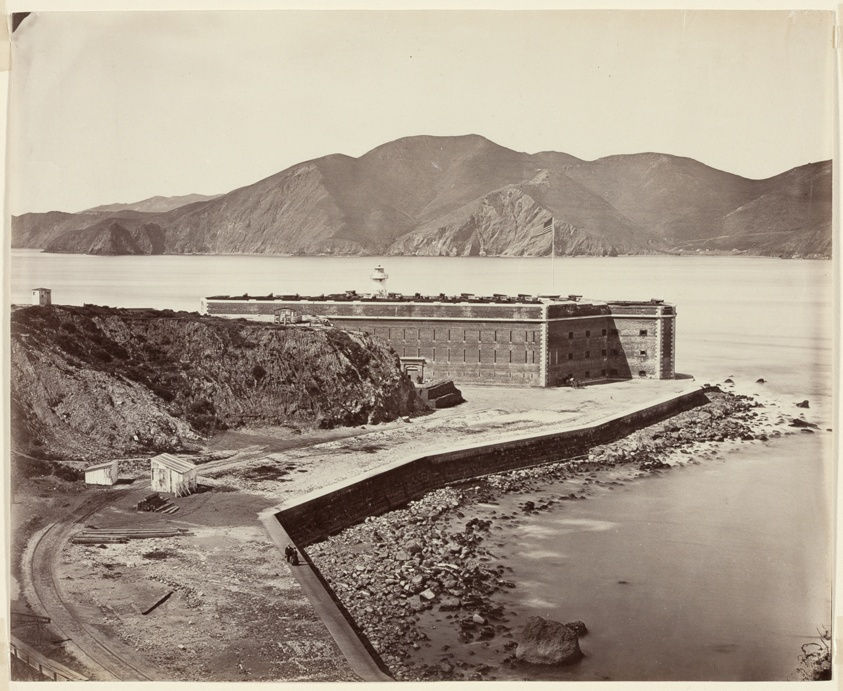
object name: Photograph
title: San Francisco Bay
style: 19th century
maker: Carleton E. Watkins; American, 1829-1916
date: c. 1860/69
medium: Albumen print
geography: United States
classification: albumen silver print; photographic process; photography; photograph